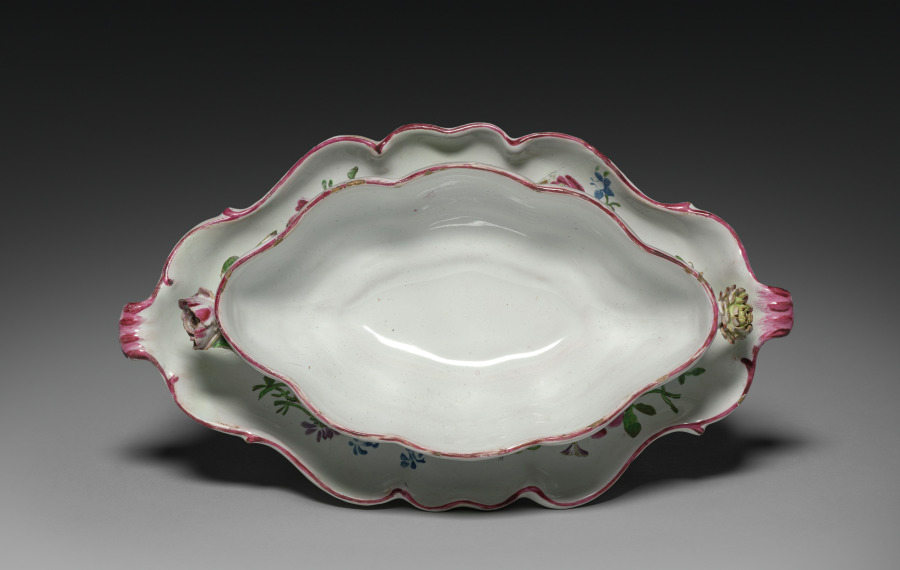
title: Sauce Tureen with Attached Stand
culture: France, Marseilles, 18th century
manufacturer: Veuve Perrin Factory (French)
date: c. 1765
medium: tin-glazed earthenware (faience) with enamel decoration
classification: Ceramic